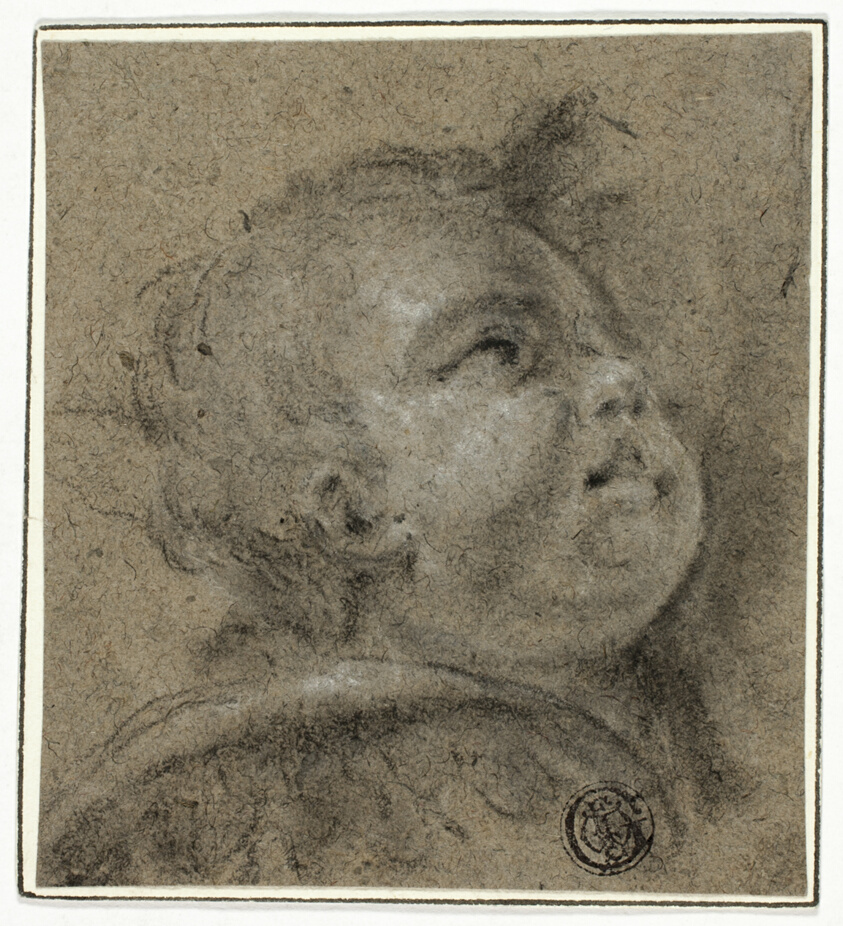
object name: Drawing and Watercolor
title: Putto's Upturned Face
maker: Unknown Artist; Italian, 1675-1725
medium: Black chalk, heightened with white chalk, on gray laid paper, laid down on ivory wove paper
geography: Italy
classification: charcoal; drawings (visual works); prints and drawing